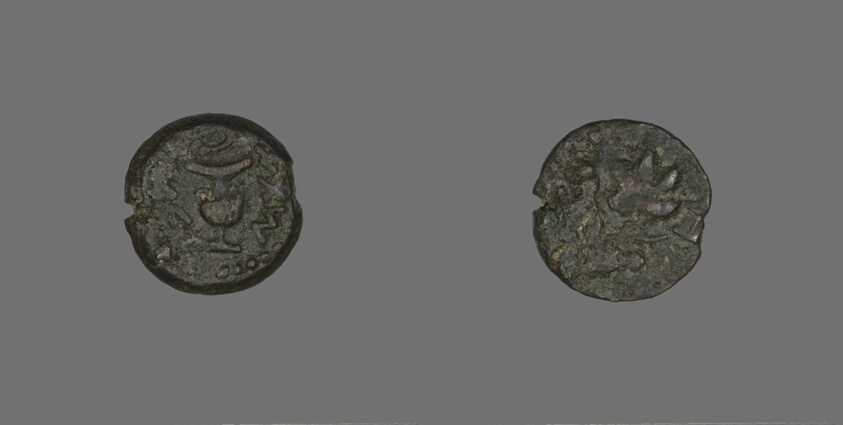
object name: Coin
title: Coin Depicting a Two-Handled Amphora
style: roman (ancient, style or period), ancient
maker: Judaean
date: 67-68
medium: Bronze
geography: Israel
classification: coin; ancient art